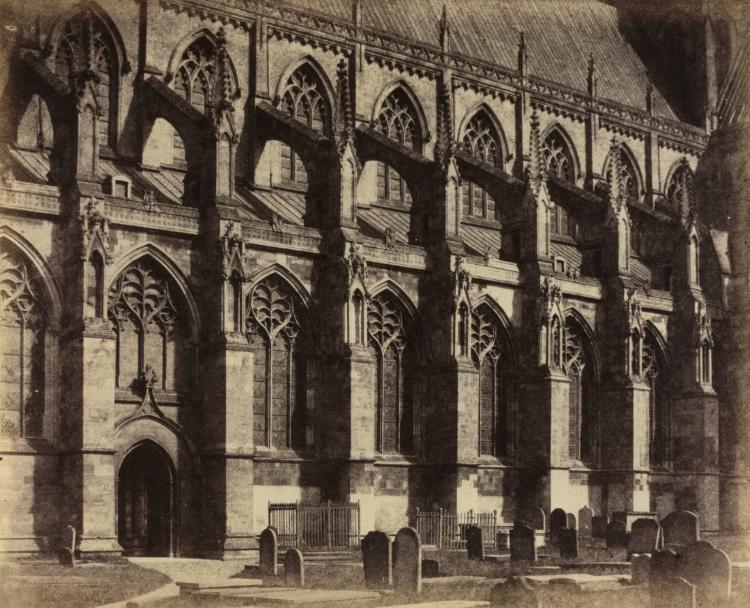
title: South Side Beverley Minster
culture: England, 19th century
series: The Whitstone Album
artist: Col. Alfred Capel-Cure (British, 1826–1896)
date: 1860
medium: albumen print from calotype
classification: Photograph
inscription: Written in pencil on recto of mount: "S Side Beverley Minster/1860"; in pencil on verso: "600-" "Russ-PO"